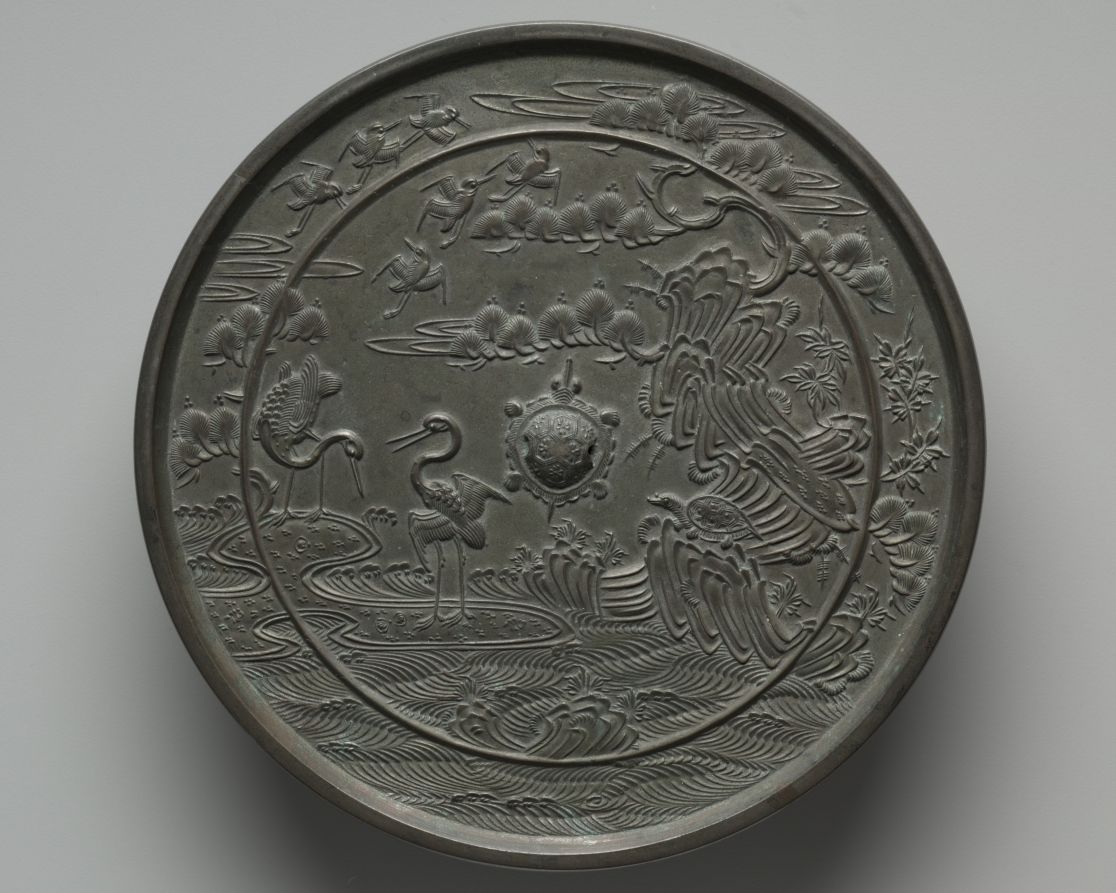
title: Mirror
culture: Japan, Kamakura period (1185–1333)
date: 1185–1333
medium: cast bronze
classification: Metalwork